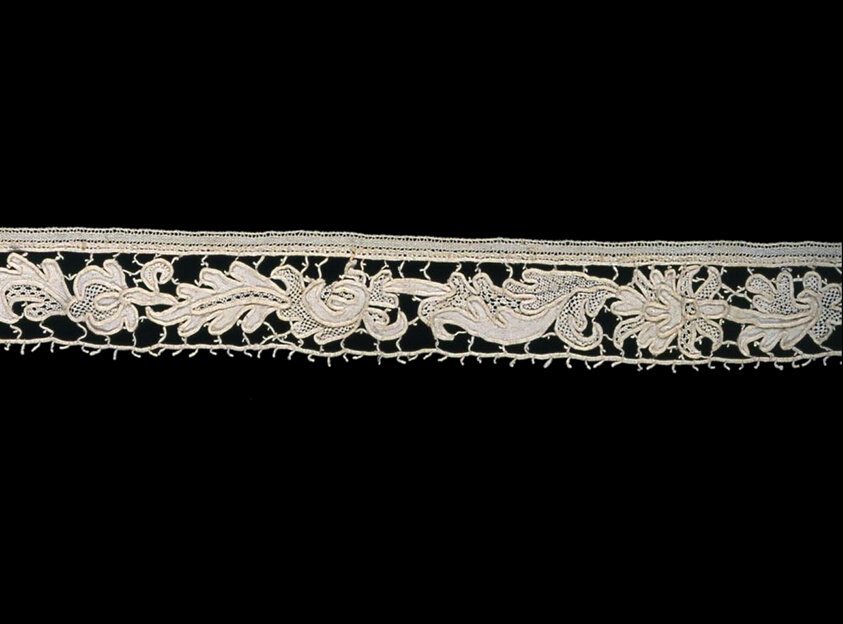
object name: Textile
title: Border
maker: Italy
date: 1875/1900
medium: Linen, needle lace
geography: Italy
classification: textile; lace - needle